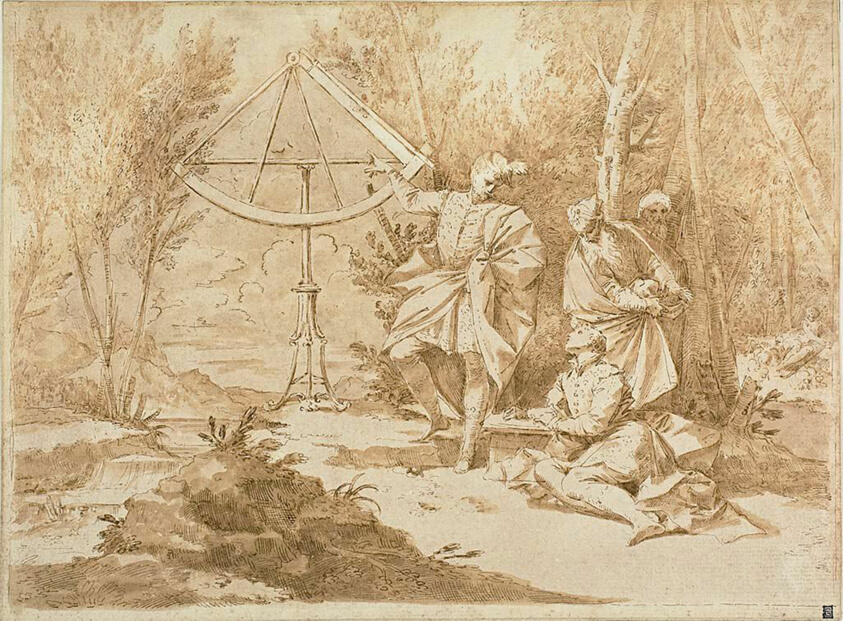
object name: Drawing and Watercolor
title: The Astronomers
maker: Donato Creti (Italian, 1671-1749)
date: 1711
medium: Pen and brown ink, with brush and brown wash, on buff laid paper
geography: Italy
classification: pen and ink drawings; drawings (visual works); prints and drawing